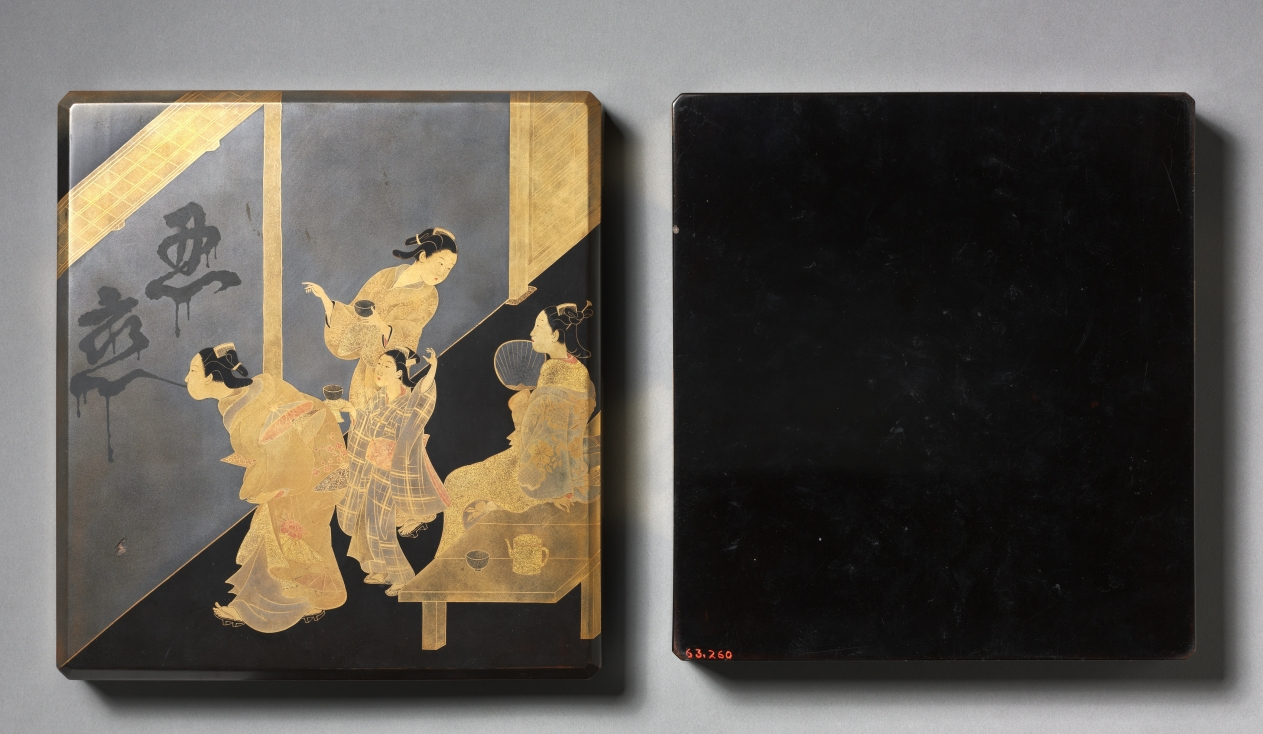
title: Writing Box with Spitting Courtesan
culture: Japan, Edo period (1615–1868)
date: early to mid-1800s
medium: Lacquered wood with maki-e (image made of sprinkled gold dust)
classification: Lacquer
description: The design on this writing box shows a courtesan who has just completed an impressive feat of spitting the term shinobukoi (忍恋), which could be translated as “hidden love” or “unrequited love,” on an earthen wall. The phrase appeared in classical Japanese poetry anthologies produced by nobles writing in ink on the finest decorated papers. Here, the confining walls of the brothel district become a space for public announcement in graffiti, with the medium being perhaps tea.